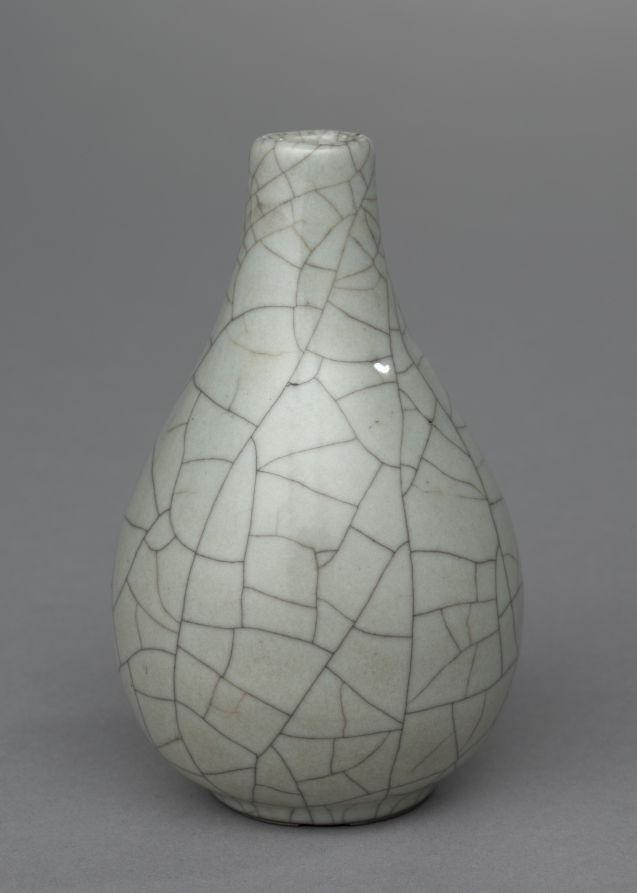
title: Bottle Vase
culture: China, Southern Song dynasty (1127-1279)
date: 1127–1279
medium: Porcelaneous stoneware, Guan ware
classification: Ceramic